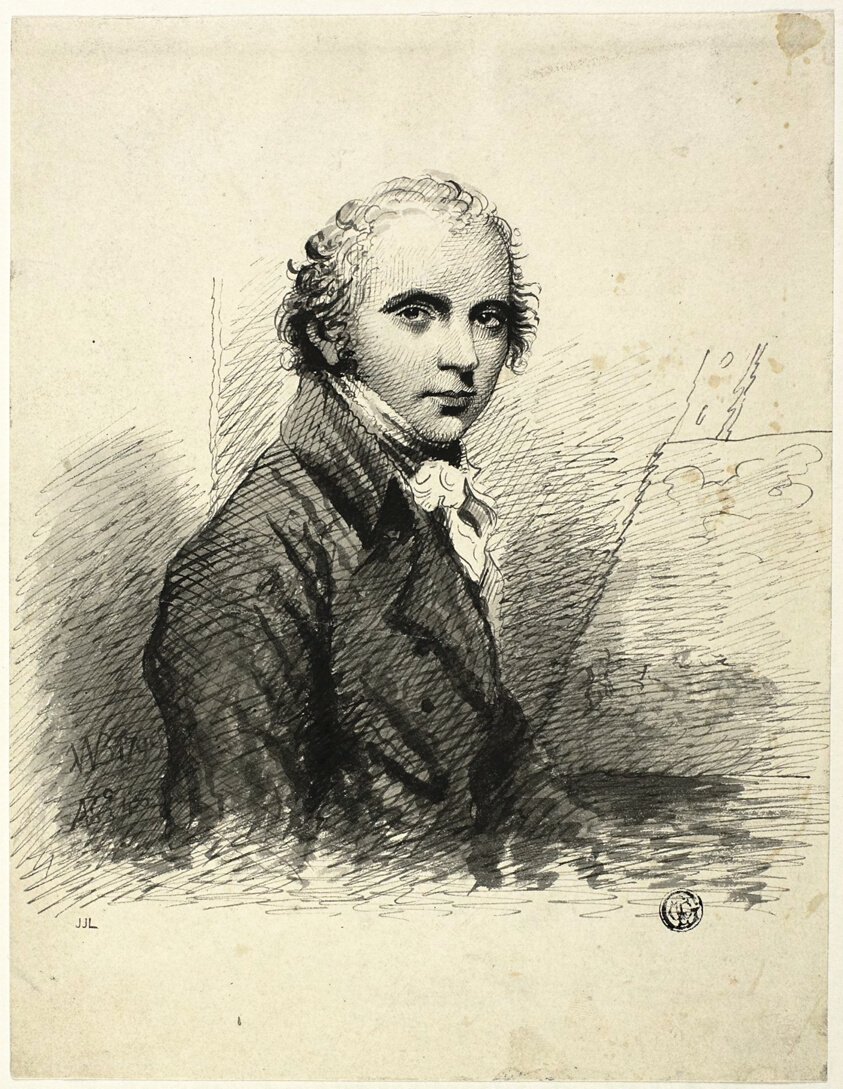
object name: Drawing and Watercolor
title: Self-Portrait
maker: After Sir William Beechey; English, 1753-1839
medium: Pen and black ink, with brush and gray wash, on ivory wove paper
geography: England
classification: pen and ink drawings; drawings (visual works); prints and drawing